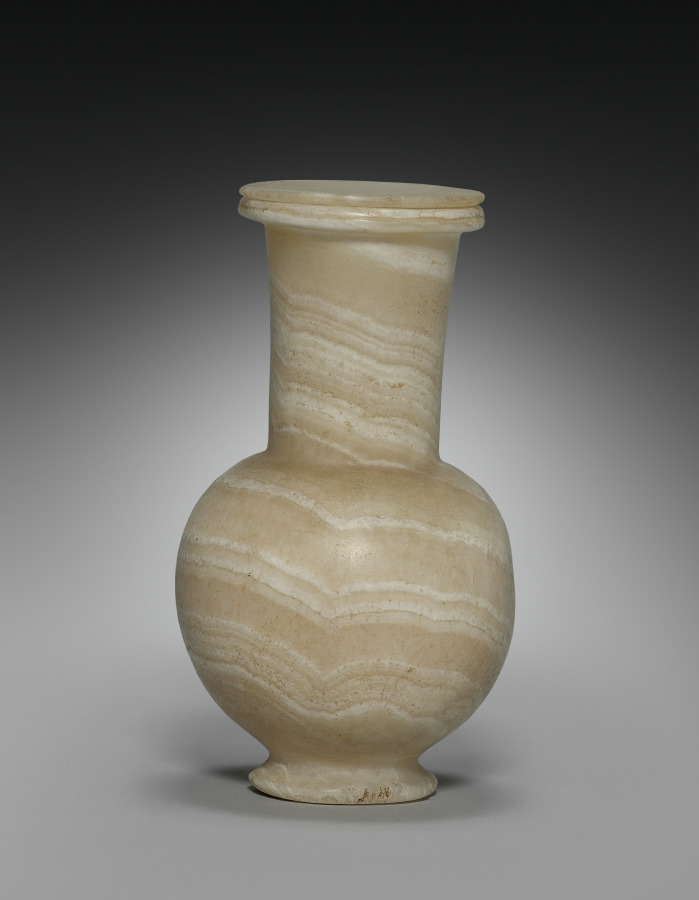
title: Long-Necked Flask with Lid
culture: Egypt, New Kingdom (1540–1069 BCE), Dynasty 18, reign of Tuthmosis III (1479–1425 BCE)–reign of Amenhotep III (1390–1352 BCE)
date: 1401–1353 BCE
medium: travertine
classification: Vessels